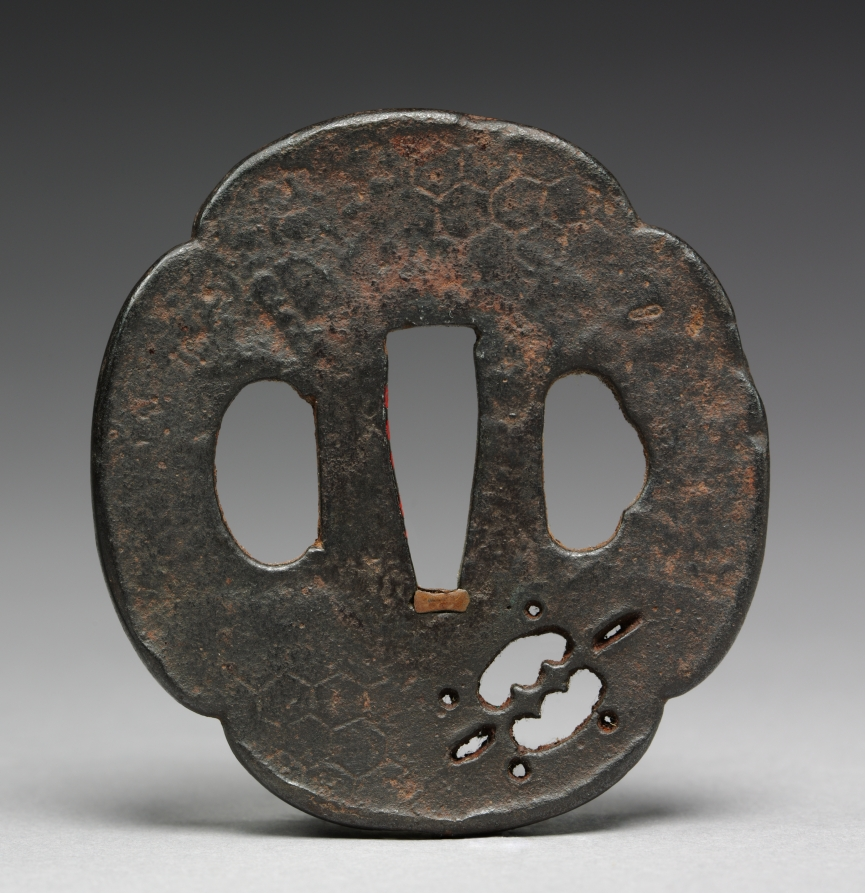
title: Sword Guard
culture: Japan, Muromachi period (1392–1573)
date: 1500s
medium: iron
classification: Arms and Armor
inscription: Signature: Nobuiye